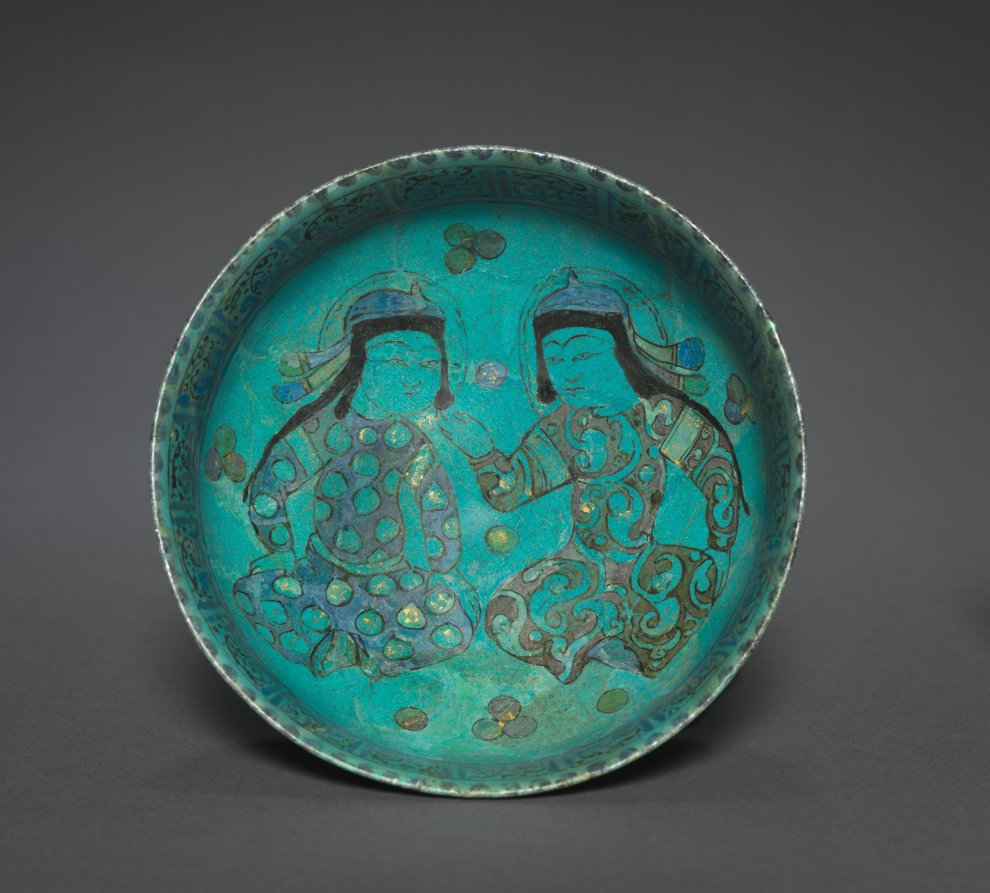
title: Bowl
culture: Iran, probably Kashan, 12th-13th century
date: 1150–1220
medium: fritware with overglaze-painted design (minai ware)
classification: Ceramic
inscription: Around the rim in a band of Kufic inscriptions.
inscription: A band of black Naskhi script is on the outside of the bowl.